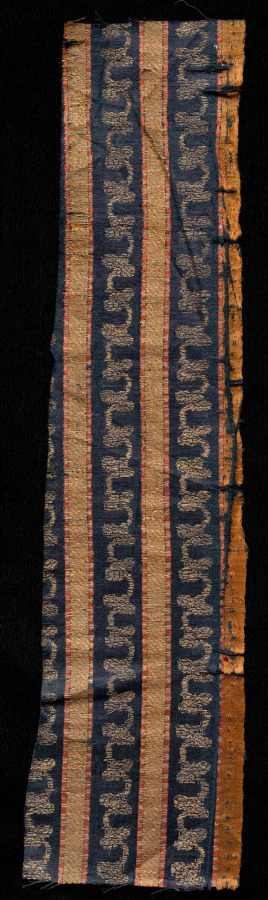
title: Fragment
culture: India, 19th century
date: 1800s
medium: brocade, "kimkhwab"; silk and metal thread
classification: Textile